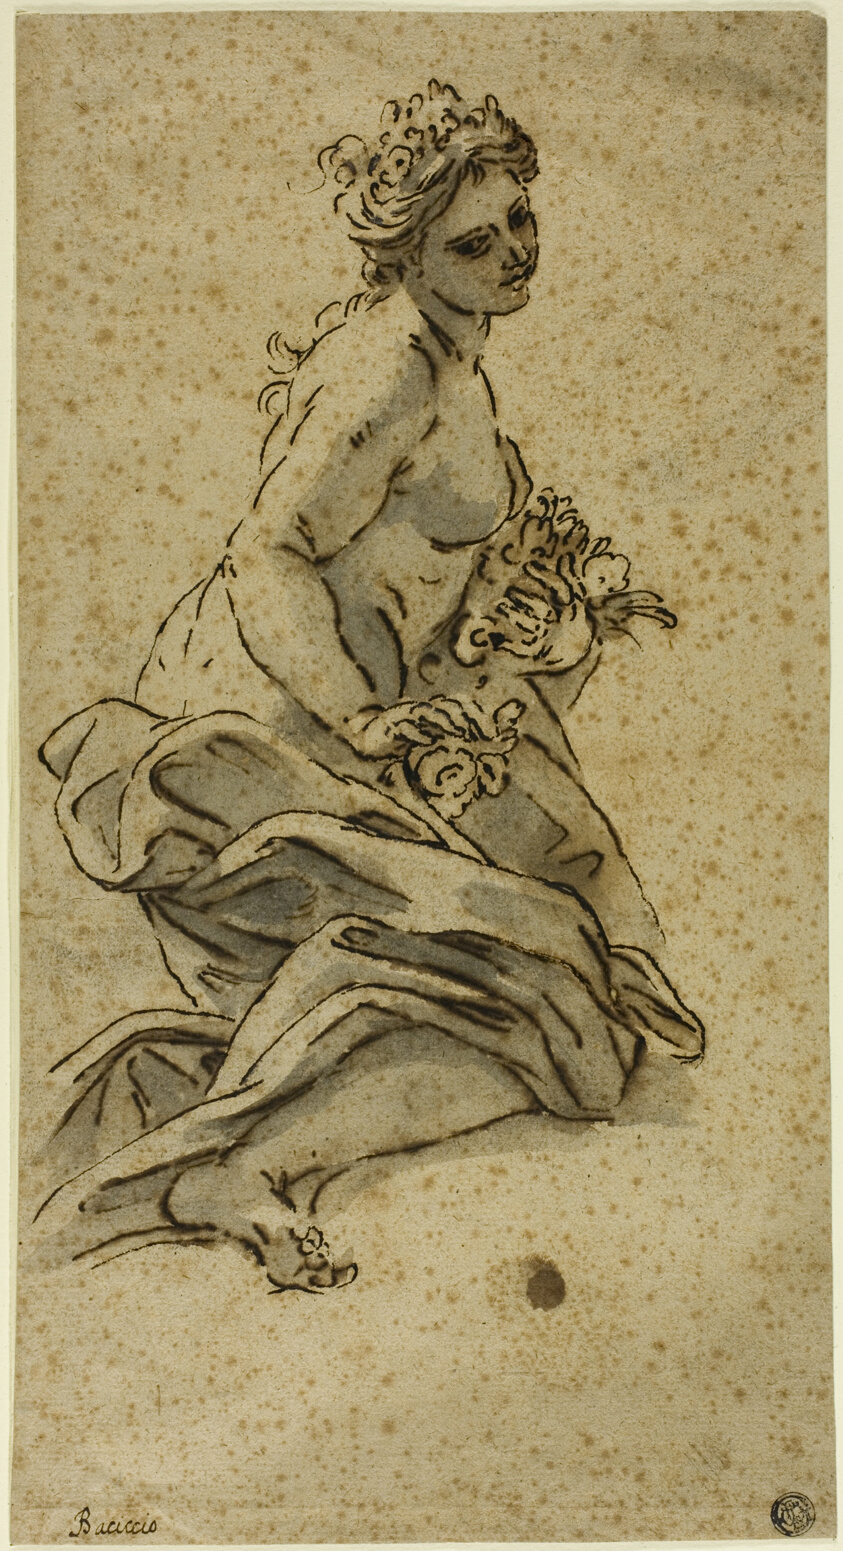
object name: Drawing and Watercolor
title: Flora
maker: Giovanni Battista Gaulli (Italian, 1639-1709)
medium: Pen and iron gall ink, with brush and blue wash, on gray brown laid paper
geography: Italy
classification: pen and ink drawings; drawings (visual works); prints and drawing